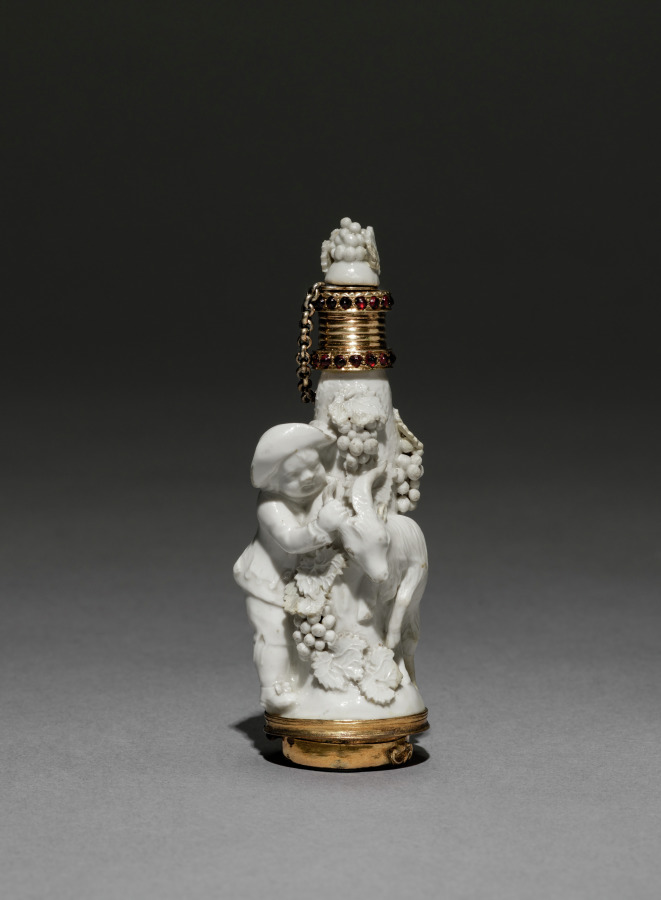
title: Scent Bottle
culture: England, Chelsea, mid-18th century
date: mid 1700s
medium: soft-paste porcelain with gilt metal mounts set with red faceted stones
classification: Miscellaneous